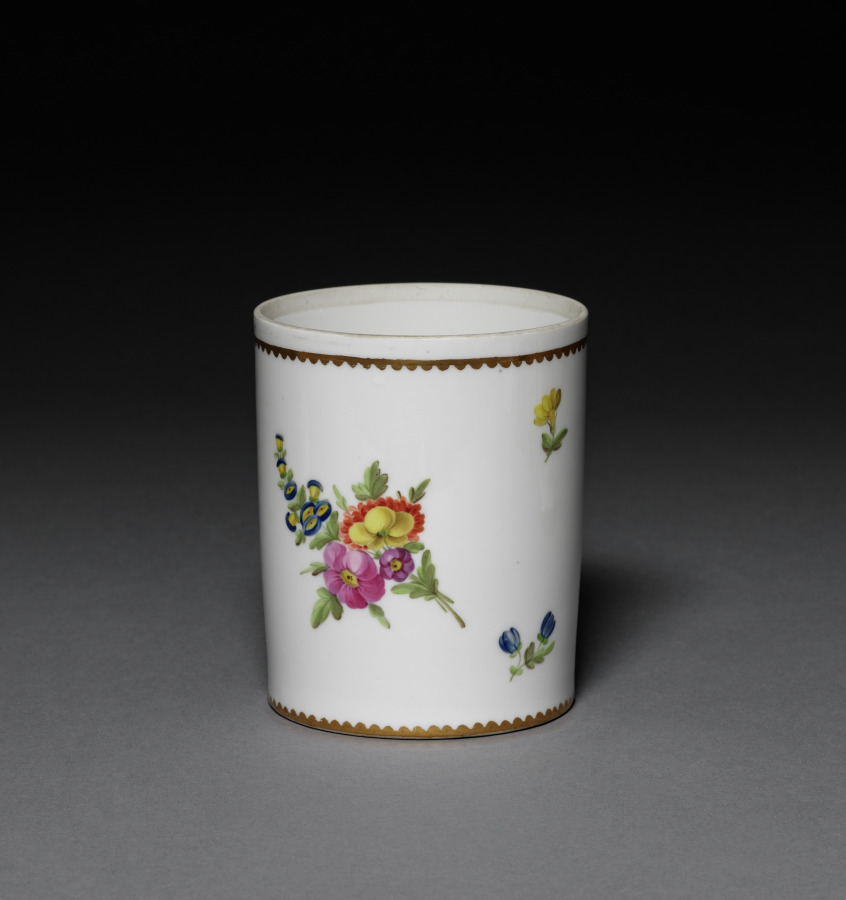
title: Jar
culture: France, 18th century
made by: Faubourg Saint-Denis (French)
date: c. 1775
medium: porcelain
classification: Ceramic